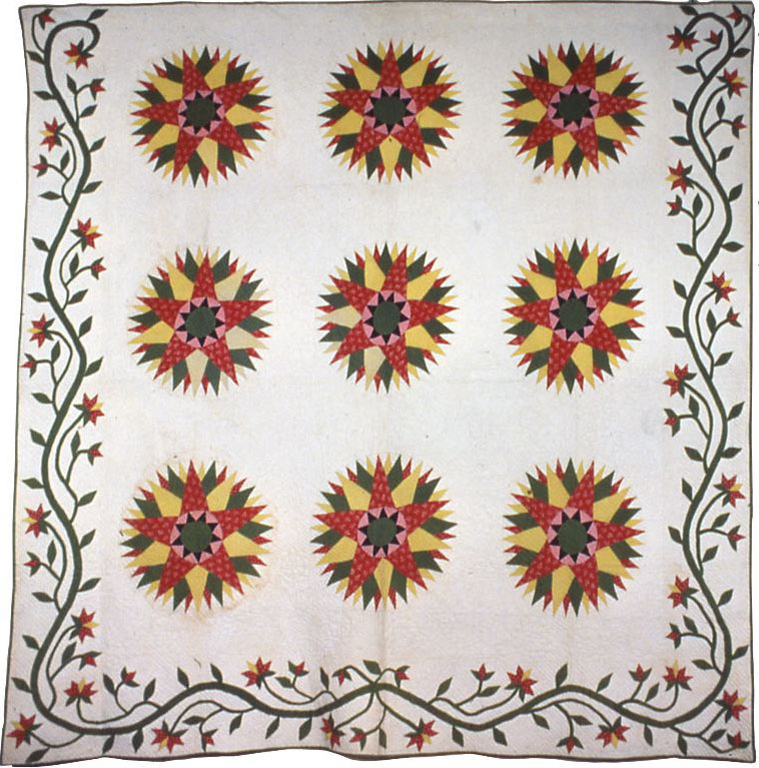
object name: Textile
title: Bedcover (Slashed Star or Rose Window Quilt)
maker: United States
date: c. 1840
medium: Cotton, plain weave; appliquéd with plain weaves; roller printed; backed with plain weave; quilted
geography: United States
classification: textile; needlework - quilt